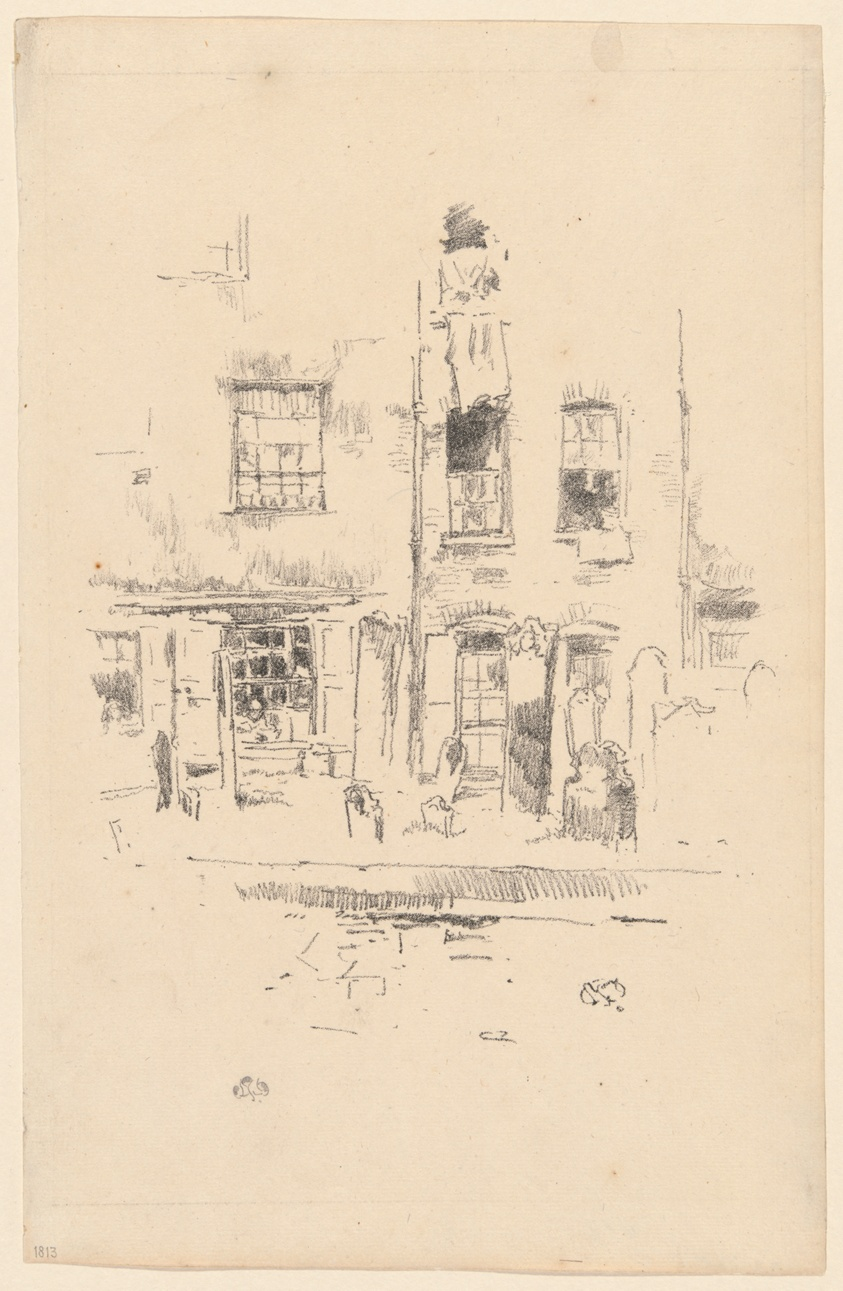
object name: Print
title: Churchyard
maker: James McNeill Whistler (American, 1834-1903)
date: 1887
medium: Transfer lithograph in black on cream laid paper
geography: United States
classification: transfer lithograph; lithograph; print; prints and drawing; paper